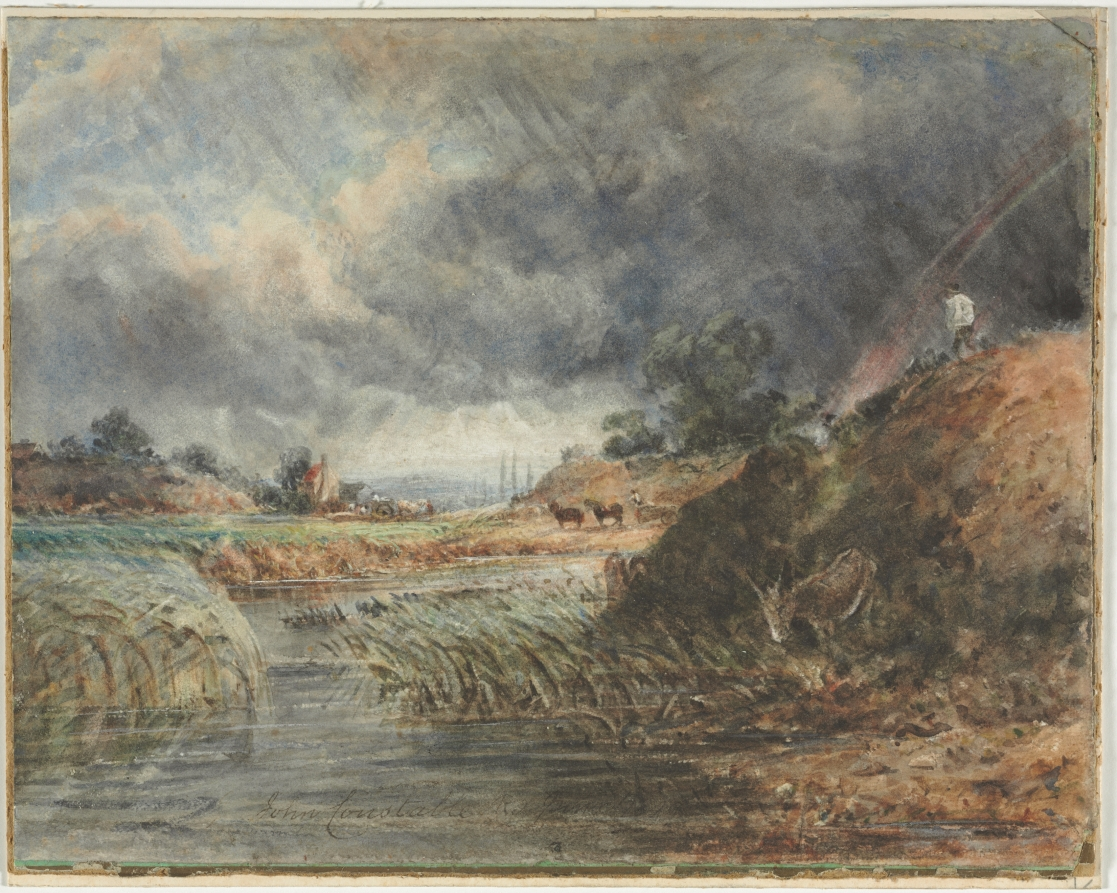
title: Hampstead Heath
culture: England, 19th century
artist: imitator of John Constable (British, 1776–1837)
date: 1800s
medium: watercolor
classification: Drawing